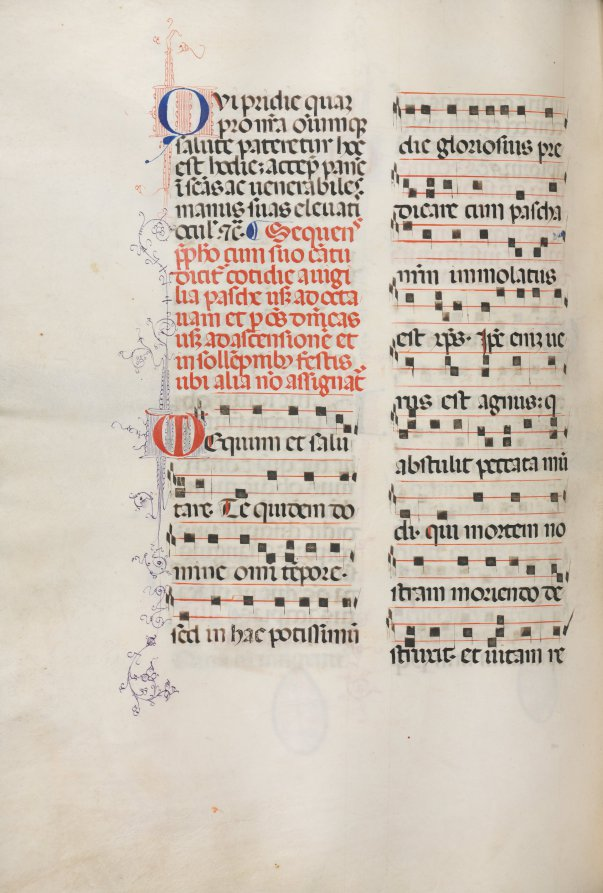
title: Missale: Fol. 178v: Music for various ordinary prayers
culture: Italy, Perugia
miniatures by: Bartolommeo Caporali (Italian, c. 1420–1503)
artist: assisted by Giapeco Caporali (Italian, d. 1478)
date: 1469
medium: ink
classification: Bound Volume